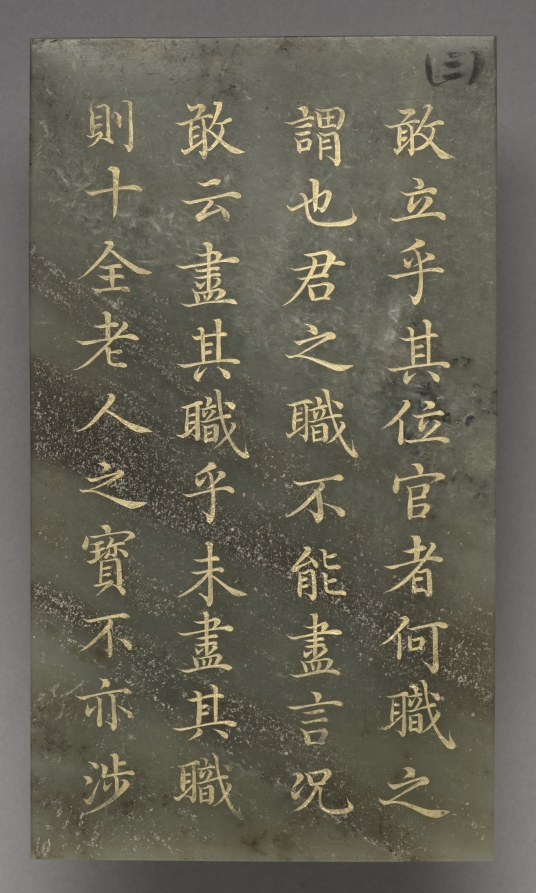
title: Tablet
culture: China, Qing dynasty (1644–1911), Qianlong reign (1736–95)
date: 1778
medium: jade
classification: Jade